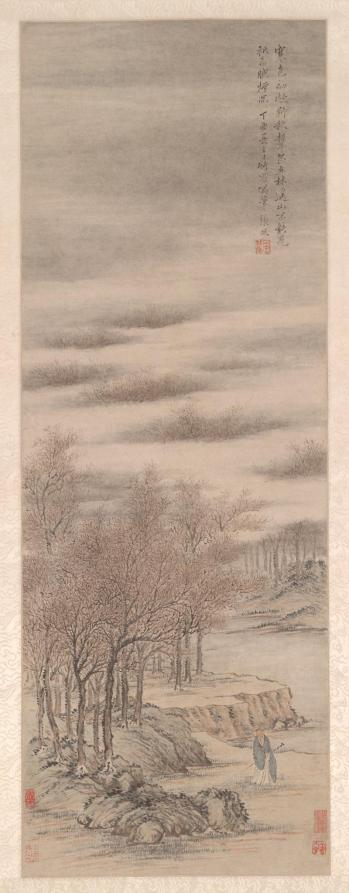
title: Listening to the Sound of Autumn in a Misty Grove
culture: China, Qing dynasty (1644-1911)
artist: Zhang Feng (Chinese, active c. 1632–1662)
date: 1657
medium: Hanging scroll; ink and color on paper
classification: Painting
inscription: Artist's inscription, signature, and 2 seals: Frosty colors have just appeared throughout the countryside,/ Autumn sounds echo unexpectedly through the trees./ The distant mountains cannot be seen,/ As the evening mist spreads, thicker and deeper./ Casually painted at the bamboo window on the solstice day of the dingyou year [1657]. Zhang Feng. [seal] Feng. [seal, lower left corner] Shangyuan Laoren. (Translation by LYSL/HK/WKH)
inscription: 3 additional seals: 1 of Fa Liang (Qing Dynasty); 2 unidentified.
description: Zhang Feng from Nanjing passed the local government examinations shortly before the fall of the Ming dynasty. With the Manchu conquest, he joined the ranks of loyalists who refused to serve the new regime. He chose the intermittently frugal life of a Buddhist adept. Many of his paintings lament the loss of the empire. In this scroll, he depicts a lone figure in a stark landscape of frosty atmosphere enshrouded in mists. Close looking reveals red strokes that color the grounds, a way of expressing his loyalty to the Ming whose family name Zhu means red.